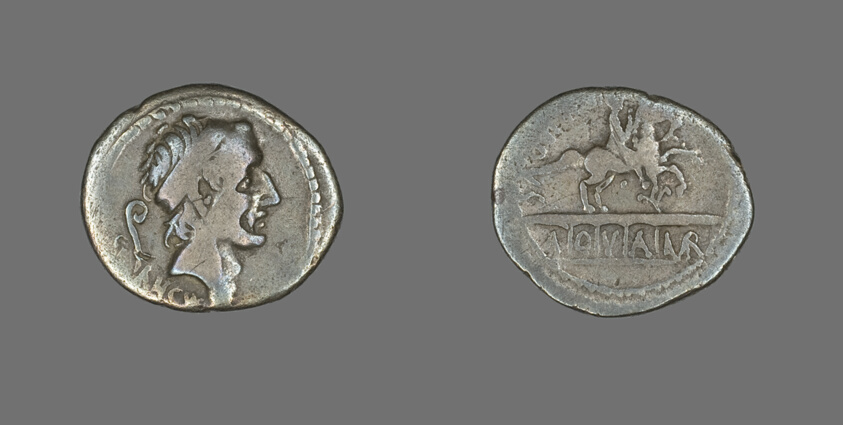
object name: Coin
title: Denarius (Coin) Depicting King Ancus Marcius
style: roman (ancient, style or period)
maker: Roman, minted in Rome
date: 56 BCE, issued by L. Marcius Philippus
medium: Silver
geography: Italy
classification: coin; ancient art